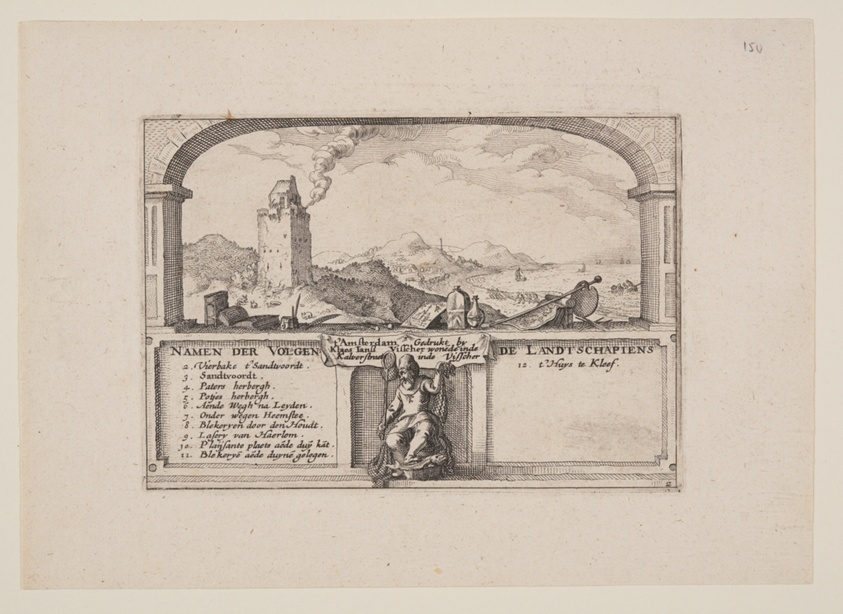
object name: Print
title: Beacon at Zandvoort, from Views in the Surroundings of Haarlem (Plaisante Plaetsen)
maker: Claes Jansz. Visscher (Netherlandish, c. 1550–c. 1612)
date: 1610/20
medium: Etching on ivory laid paper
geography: Netherlands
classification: print; paper; prints and drawing; etching